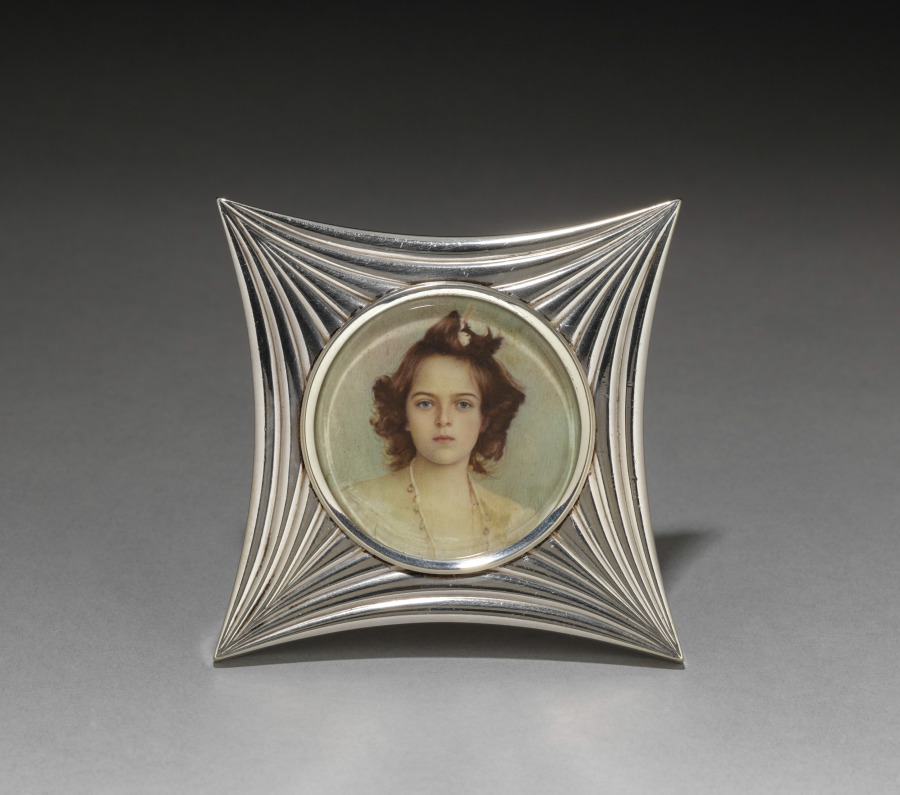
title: Frame with Portrait Miniature of Princess Yusopov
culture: Russian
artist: House of Fabergé (Russian, 1842–1918)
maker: Philip Theodor Ringe (Russian, 1824–1882)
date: c. 1893–96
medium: silver, ivory, watercolor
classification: Silver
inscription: Cyrillic initials “TR”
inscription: “84” silver standard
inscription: St. Petersburg coat of arms (crossed anchors and scepter)